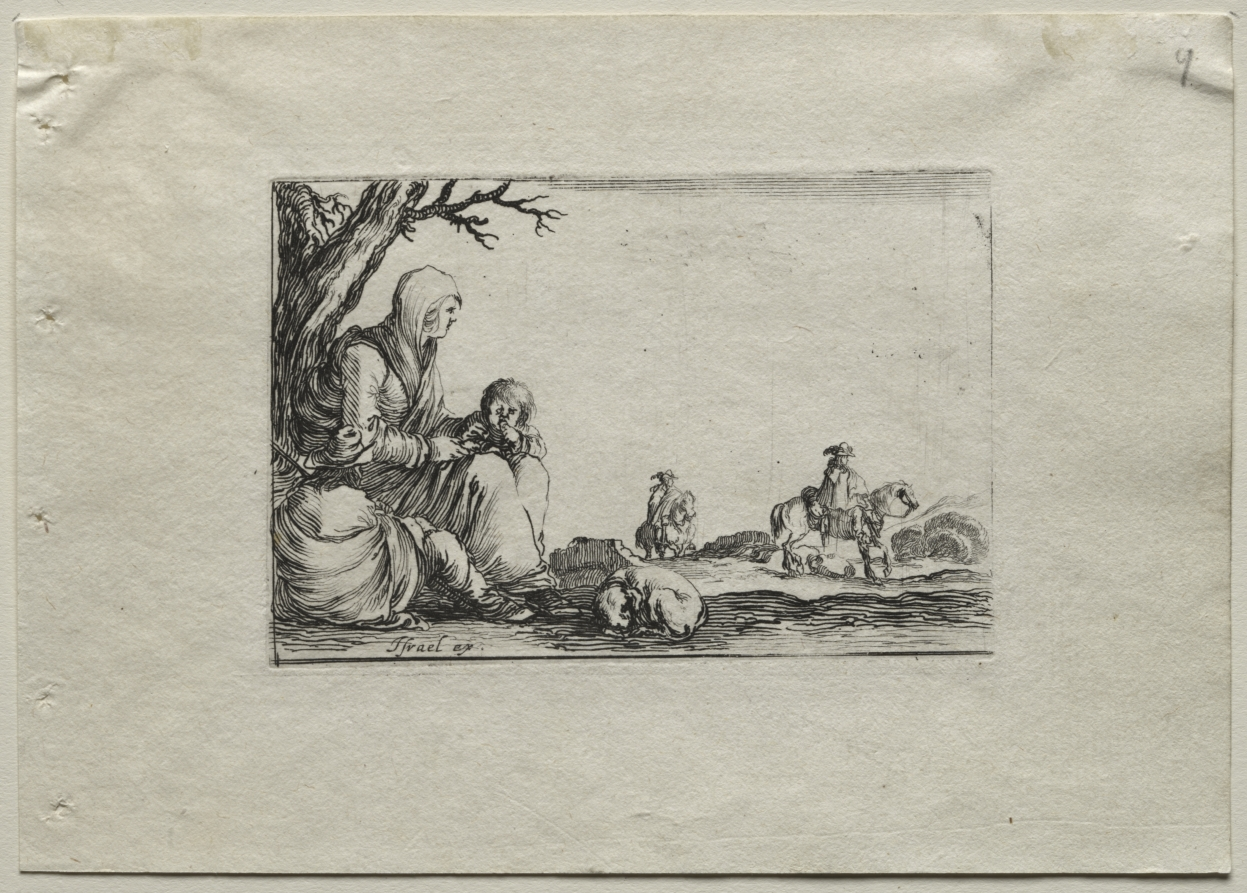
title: Caprices: Seated Beggar Woman with Two Children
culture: Italy, 17th century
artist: Stefano Della Bella (Italian, 1610–1664)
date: c. 1642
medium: etching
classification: Print